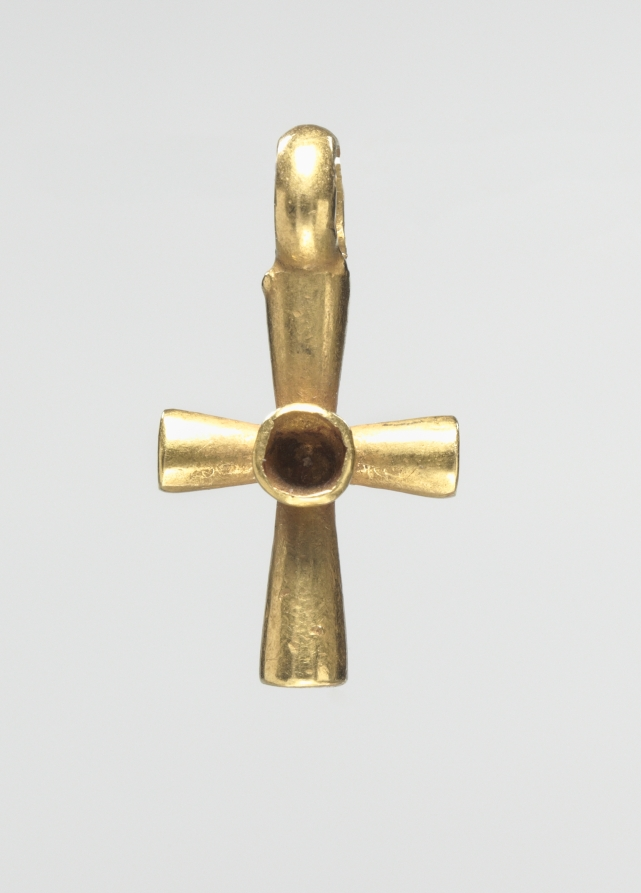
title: Pendant Cross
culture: Byzantium, early Byzantine period, 6th century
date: 500s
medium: gold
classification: Jewelry